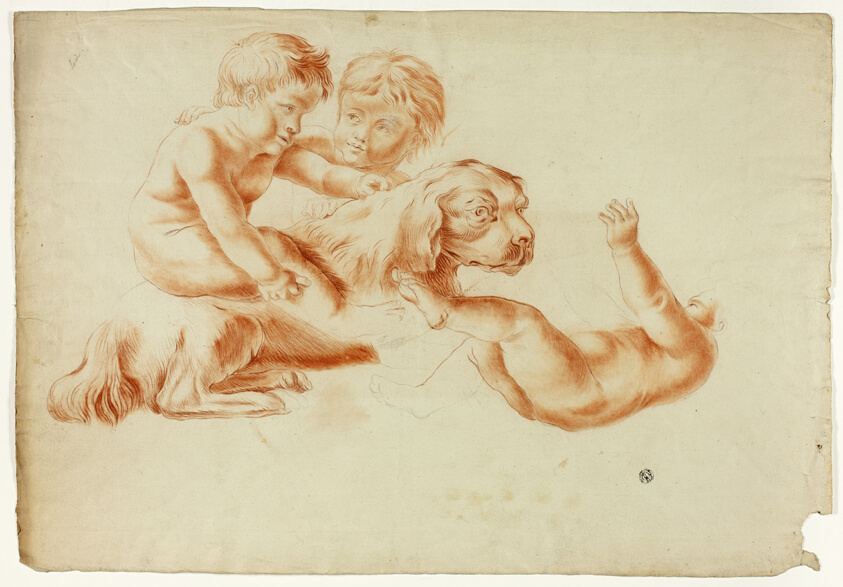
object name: Drawing and Watercolor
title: Three Putti Playing with Dog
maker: Unknown Artist; possibly French, 18th century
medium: Red chalk with stumping, over graphite, with red chalk wash, on cream laid paper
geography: France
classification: chalk; paper; drawings (visual works); prints and drawing